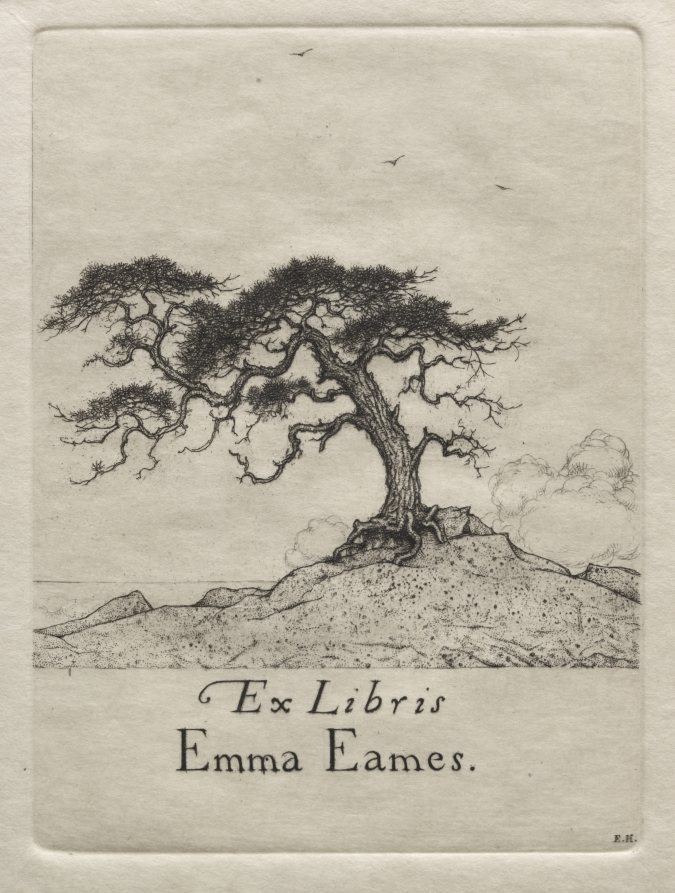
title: Ex Libris - Emma Eames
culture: America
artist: Ernest Haskell (American, 1876–1925)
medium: etching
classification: Print